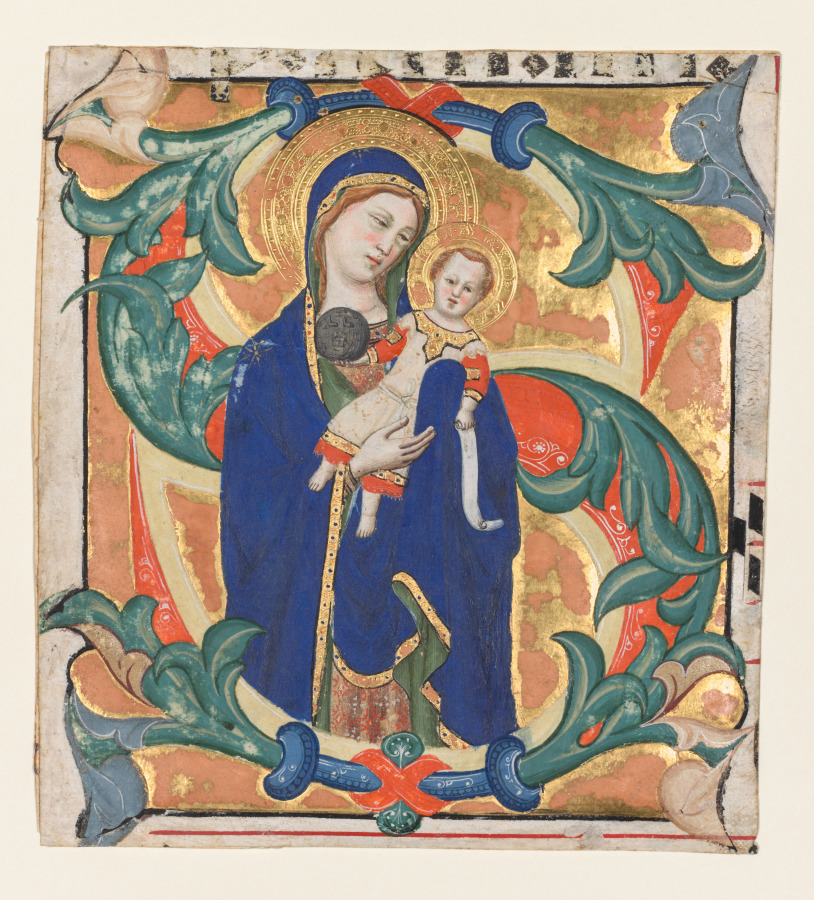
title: Initial S[alve sancta parens] from a Gradual: Madonna and Child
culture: Italy, Florence, 14th century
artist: Don Silvestro dei Gherarducci (Italian, 1339–1399)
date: c. 1370–1374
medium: ink, tempera, and gold on vellum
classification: Manuscript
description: Along with several other excised leaves and miniatures that survive in various libraries and museums, this decorated initial S was part of a magnificent gradual produced in the scriptorium of the monastery of Santa Maria degli Angeli in Florence. The Madonna and Child was a standard image for the Saturday votive Mass to the Virgin. This initial originally introduced the text: Salve sancta parens (“Hail, Holy Mother”).